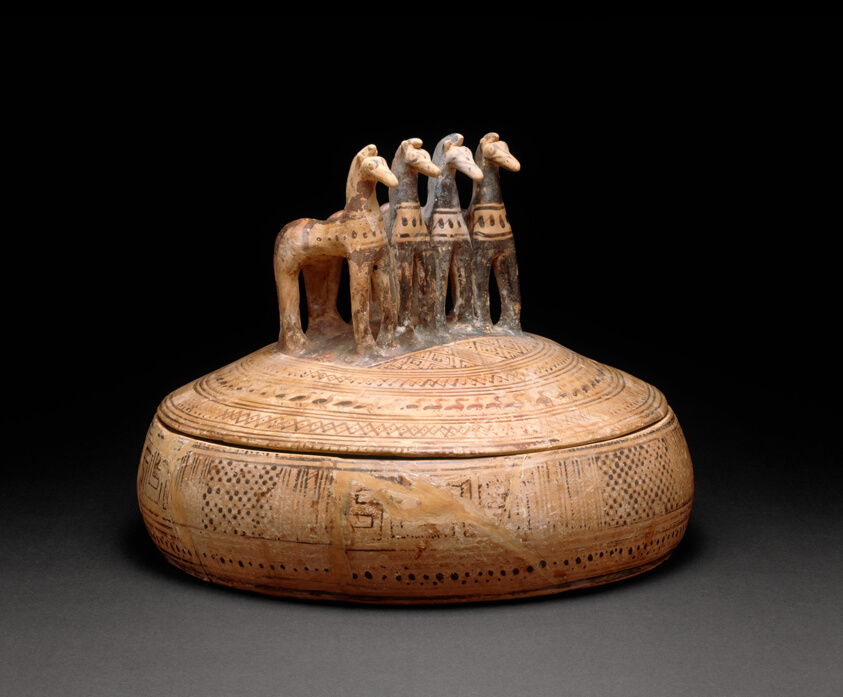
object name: Vessel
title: Pyxis (Container for Personal Objects)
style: geometric, attic, ancient, greek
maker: Greek; Athens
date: 730-720 BCE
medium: terracotta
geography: Athens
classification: earthenware; ceramics; vessel; ancient art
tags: horses, animals, containers